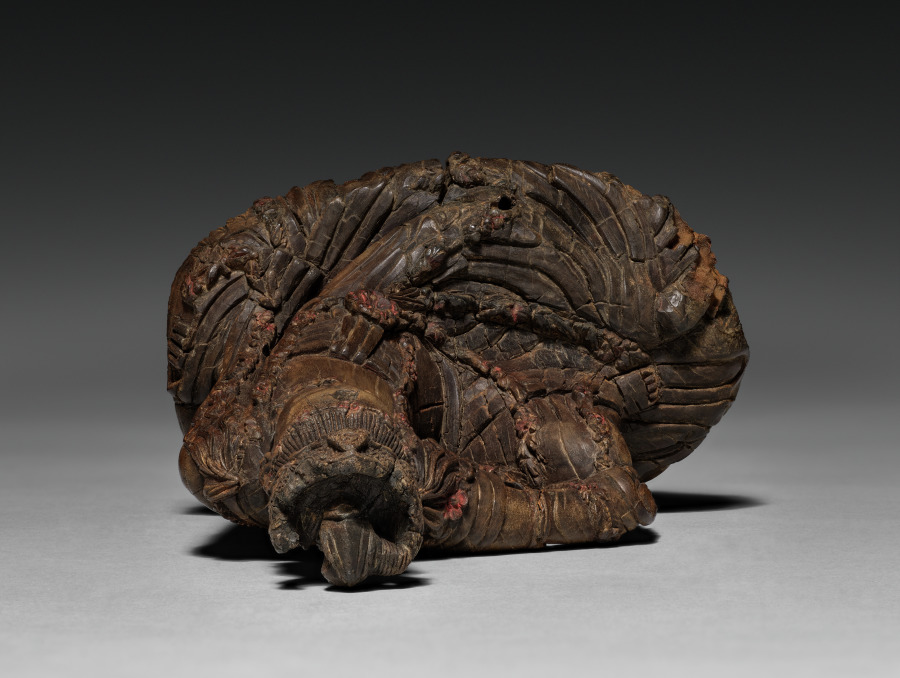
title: Potalaka Guanyin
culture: China, Five dynasties (907-960)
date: 900s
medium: Carved sandalwood with traces of paint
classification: Sculpture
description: This portable figure of Guanyin, the Bodhisattva of Compassion who vowed to stay on earth to help human beings, is carved of precious sandalwood. It is lavishly covered with garlands of flowers that retain traces of the original red paint. The small sculpture may have been used in a private devotional context.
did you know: Mount Potala is the mythical home of the bodhisattva Avalokiteśvara, called Guanyin in Chinese.